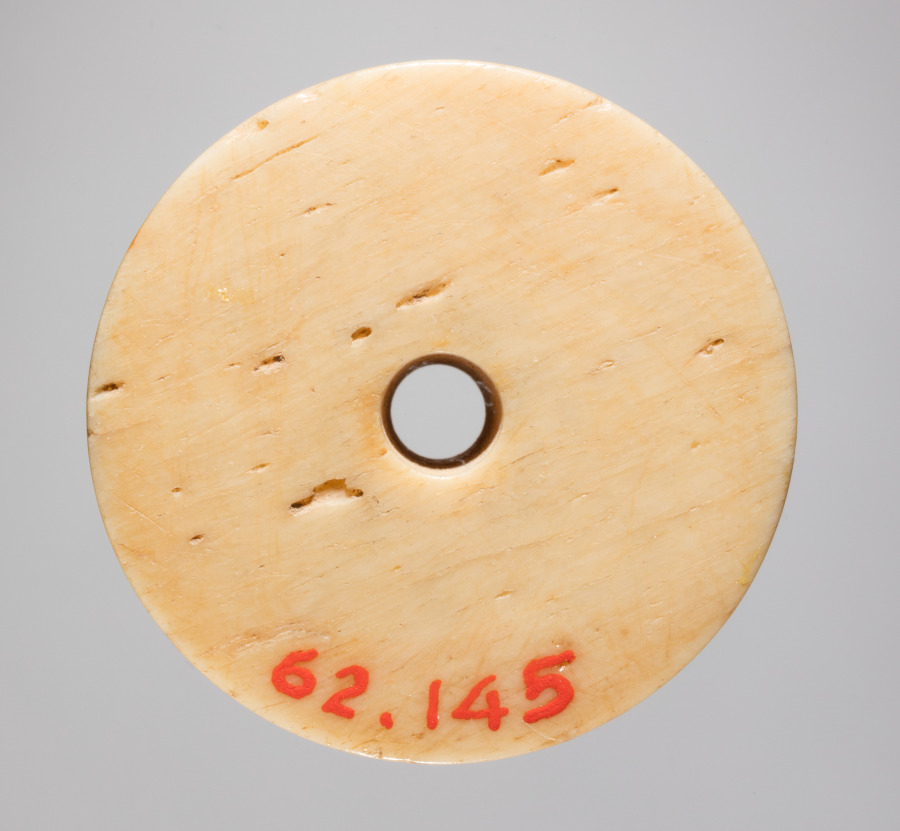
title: Spindle Whorl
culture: Iran, early Islamic period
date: 700s - 900s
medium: bone, incised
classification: Spindle Whorl